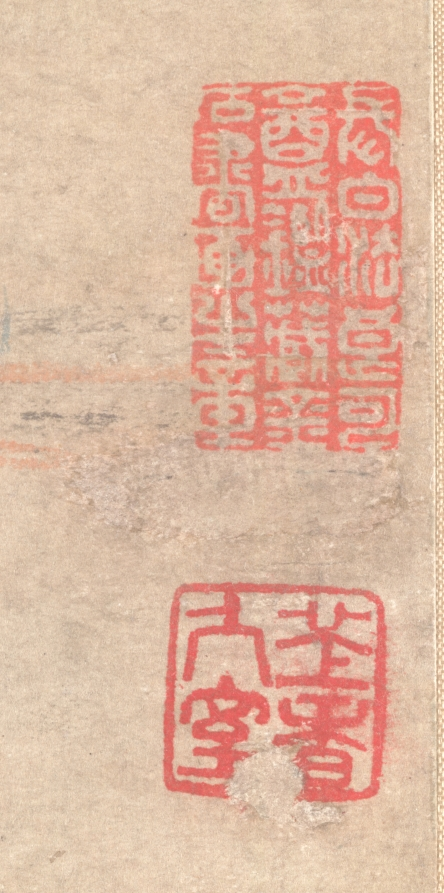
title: Listening to the Sound of Autumn in a Misty Grove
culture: China, Qing dynasty (1644-1911)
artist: Zhang Feng (Chinese, active c. 1632–1662)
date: 1657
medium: Hanging scroll; ink and color on paper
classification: Painting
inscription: Artist's inscription, signature, and 2 seals: Frosty colors have just appeared throughout the countryside,/ Autumn sounds echo unexpectedly through the trees./ The distant mountains cannot be seen,/ As the evening mist spreads, thicker and deeper./ Casually painted at the bamboo window on the solstice day of the dingyou year [1657]. Zhang Feng. [seal] Feng. [seal, lower left corner] Shangyuan Laoren. (Translation by LYSL/HK/WKH)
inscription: 3 additional seals: 1 of Fa Liang (Qing Dynasty); 2 unidentified.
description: Zhang Feng from Nanjing passed the local government examinations shortly before the fall of the Ming dynasty. With the Manchu conquest, he joined the ranks of loyalists who refused to serve the new regime. He chose the intermittently frugal life of a Buddhist adept. Many of his paintings lament the loss of the empire. In this scroll, he depicts a lone figure in a stark landscape of frosty atmosphere enshrouded in mists. Close looking reveals red strokes that color the grounds, a way of expressing his loyalty to the Ming whose family name Zhu means red.